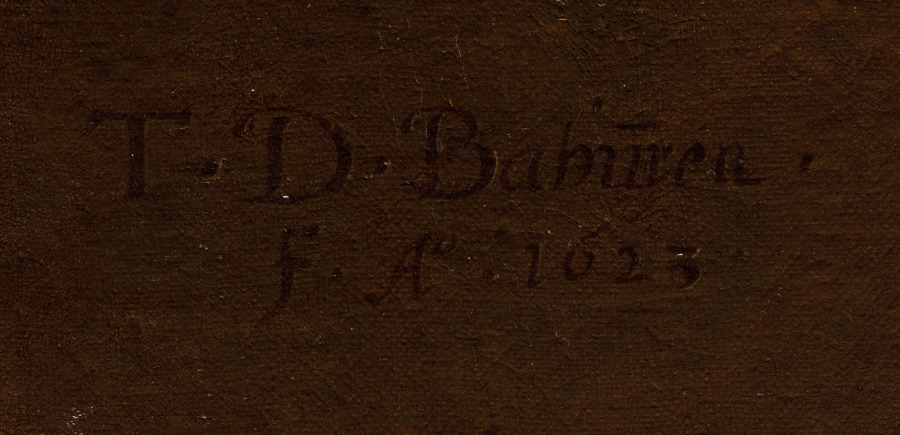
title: Violin Player with a Wine Glass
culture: Netherlands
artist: Dirck van Baburen (Dutch, c. 1595–1624)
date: 1623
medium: Oil on canvas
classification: Painting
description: Baburen, a native of Utrecht, was among the first to introduce Caravaggio’s revolutionary style to the Netherlands. Half-length figures positioned close to the picture plane project a lively spontaneity. This musician’s loose, colorful dress marks him as a figure at the edges of society, unbound by behavioral norms—associations enhanced by his bold gaze, unshaven face, and cheeky grin complete with broken tooth.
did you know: Other paintings by Utrecht artists feature the same model, whose extravagant mustache and broken tooth make him instantly recognizable.